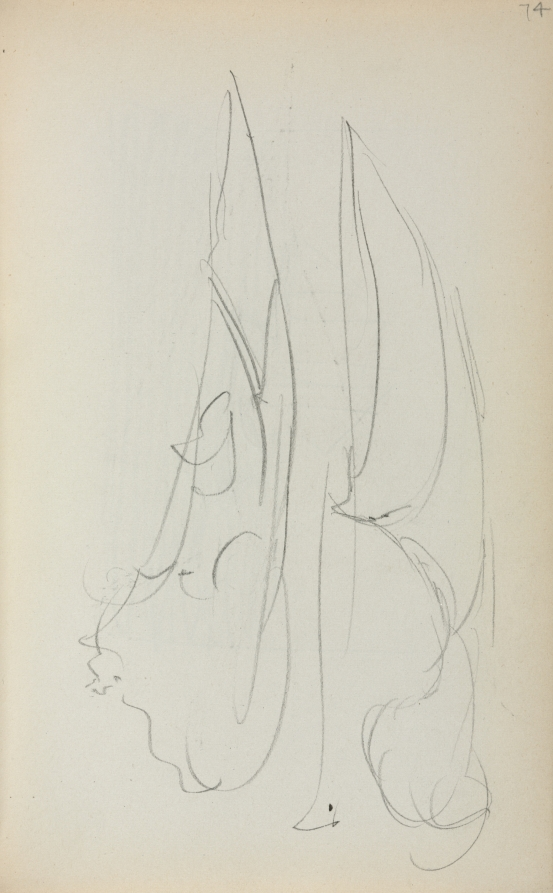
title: Italian Sketchbook: Two Sails (page 74)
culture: America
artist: Maurice Prendergast (American, born Newfoundland [now Canada], 1858–1924)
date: 1898–1899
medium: pencil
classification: Bound Volume